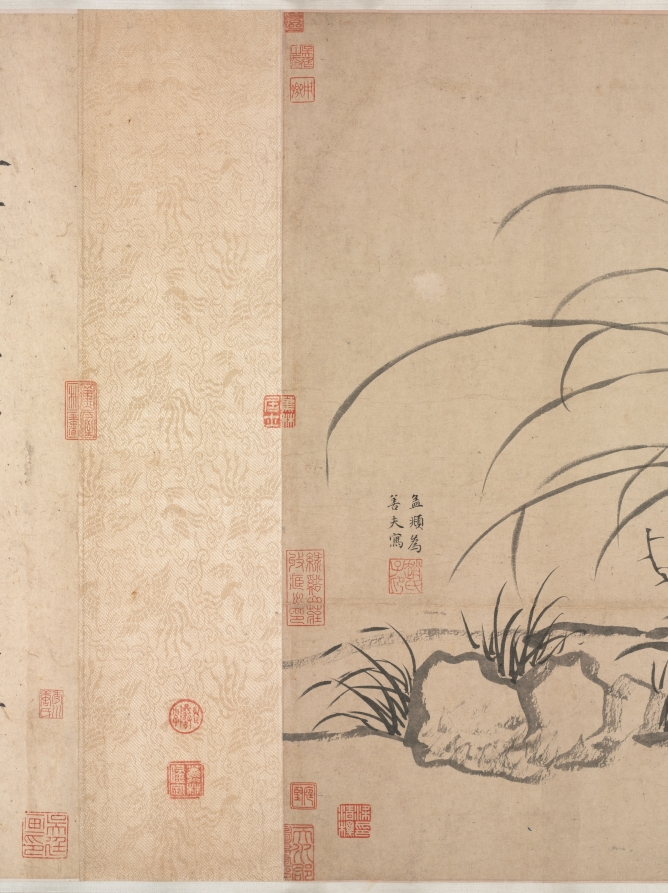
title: Bamboo, Rocks and Lonely Orchids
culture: China, Yuan dynasty (1271-1368)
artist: Zhao Mengfu (Chinese, 1254–1322)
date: 1271–1368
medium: Handscroll; ink on paper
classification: Painting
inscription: 竹石幽蘭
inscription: 孟頫為善夫寫. [印] 趙氏子昂; [印] 松雪齋; [印] 天水郡圖書印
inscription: 古人善書者必能畫點墨作蠅，便自有生意。松雪翁蘭石草聖飛帛筆法皆具，可寶也。安陽韓性 [印]明善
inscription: Colophon 2. Qiu Yuan 仇遠 (1247-after 1328), a respected poet during the Song and Yuan periods. He was linked to, among others, Zhao Mengfu and Gao Kegong. Zhao Mengfu painted a version of Nine Songs 九歌圖 for him, and Gao Kegong dedicated to him a painting titled Mountain Village 山村圖 (current whereabouts unknown). His poem here is also preserved in his collected works.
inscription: Colophon 3. Zheng Yuanyou 鄭元祐 (1292-1364), an erudite scholar and teacher of renown, active in Hangzhou and Suzhou. In the 1350s, when Gu Ying’s literary gatherings were at their peak, he was already elderly and participated in a limited way.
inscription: Colophon 4. Wu Kegong 吳克恭 (active mid-1300s), a friend of Gu Ying and Ni Zan 倪瓚 (1301–1374), a major Yuan painter.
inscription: Colophon 5. Angji 昻吉 (jinshi of 1348), of Western Xia 西夏 origin and a poet of distinction. He wrote an introduction to the painting Literary Gathering at Yushan 玉山雅集圖, of which Zhang Wo was the painter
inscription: Sheet 2. Yuan: friends of Gu Ying Colophon 6. Wang Zifang 王孜方 (active mid-1300s), an official who, at the time of his visits to Gu Ying’s estate, had reached the rank of Minister. He is better known under the name Wang Keju 王可矩.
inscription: Colophon 7. Ke Jiusi 柯九思 (1290–1343), a major official who served in the Kuizhang Pavilion 奎章閣 and as an advisor to Emperor Wenzong in matters of calligraphy and painting.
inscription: Colophon 8. Yu Li 于立 (active mid-1300s), a Daoist recluse, poet, and close friend of Gu Ying, so much so that during his visit to Gu Ying’s estate he was given accommodation in a special pavilion. His poem here is also preserved in Gu Ying’s Cao tang ya ji.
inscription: 至正十一年十月廿八日男奕百拜堇觀 [印] 趙奕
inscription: Colophon 10. Yu Ji 虞集 (1272-1398), a major official and literary figure who also served in the Kuizhang Ge. His poem is recorded in his collected works. The poem is one of a set of four inscribed at the request of Wang Huayu 汪華玉 on Orchids and Rock 蘭石圖 by Zhao Mengfu, obviously a different, long lost, painting. Wang Huayu was an official and a collector (jinshi of 1327). Yu Ji’s colophon here was written before 1348 and during his retirement in Linchuan 臨川, Jiangxi, possibly sent from there. It is possible he had not seen the painting, and his calligraphy here appears to be rather casual and detached, jotting down an old poem without much care, contrary to his earlier practice.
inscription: Colophon 11. Sun Shi 孫時 (mid-1300s–early 1400s), a native of Yuncheng 鄆城, Shandong, and a jinshi of 1390. He may have been quite young when paying a visit to the Yushan gatherings in the late 1340s and early 1350s.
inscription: Colophon 12. Zhang Zhu 張翥 (1287–1368), Qiu Yuan’s disciple and a poet of renown, who enjoyed a belated career in officialdom and was known for his integrity.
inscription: Sheet 4. Yuan and Ming: further friends of Gu Ying; colophon 17 begins the early Ming sequence. Colophon 13. Zhang Wo 張渥 (active c. 1336-after 1364), a frustrated scholar, a poet, and a painter of landscape and figures. An active participant in Gu Ying’s literary circle, he painted the Literary Gathering at Yushan, a pictorial document of the individuals and activities on Gu Ying’s estate. His rendering of Nine Songs is well known, and one version is in the collection of the Cleveland Museum of Art (see 1959.138). His poem here is also found in Gu Ying’s Cao tang ya ji, under the entry “ti Zhao Hanlin mo lan 題趙翰林墨蘭” (inscribed on the Ink Orchid by Zhao the Hanlin academician). This is a rare instance of calligraphy as well as signature by the artist.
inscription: 觀吳興公竹石幽蘭圖使人鄙吝頓消。其筆勢從橫天真爛澷，一出於二王書法。冝仲瑛寳而玩之異於常品也。至正八年十月天台陳基書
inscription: Colophon 15. Zhang Shen 張紳 (active about 1340–after 1385), a respected calligrapher and participant in Gu Ying’s literary gathering. He resided in Kunshan, the same city where Gu Ying’s estate lies. In the third line of the poem, he mentioned Gu Ying’s hao, “Jinsu 金粟.” This was a name he assumed later in life, after the death of his mother in the year 1356. Thus this inscription must have been written after that date.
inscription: Colophon 16. Wang Sun 汪遜 (active mid-14th century), a little-known native of Kuaiji 會稽, who may have been one of the infrequent visitors to Gu Ying’s estate.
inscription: Colophon 17. Hu Guang 胡廣 (1370-1418) is the first Ming colophon writer on this scroll. He was an official of great power in the court and a trusted advisor of Emperor Chengzu; he served as the Grand Academician of the Hall of Literary Profundity 文淵閣大學士 and Grand Academician of the Left Secretariat of the Heir-Apparent 左春坊大學士.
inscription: Sheet 5. Early Ming Colophon 18. Wang Yinshi 王尹實 (active about 1403–about 1424), a native of Siming 四明, Zhejiang, and a minor official and calligrapher.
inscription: Colophon 19. Zhang Yuchu (signed here as “Wuwei 無 為”), the forty-third Heavenly Master of the Zhengyi sect of Daoism. A man of erudition, he was also a poet, painter, and calligrapher. A modified version of the poem here was published in his collected works titled Xian quan ji 峴泉集. A slight modification in the first line is the only change: “Wu xing miao yao nian bing xue zi 吳興玅年氷雪姿.”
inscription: Colophon 20. Yao Guangxiao 姚廣孝 (1335-1418), a Buddhist monk, scholar, and counselor to Chengzu in his successful attempt at usurpation of the throne. Yao Guangxiao was a controversial figure but wielded enormous power.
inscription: Sheet 6. Wang Ning alone Colophon 21. Wang Ning 王寧 (d. 1411) signed as “Qingzhen 清真” in this colophon. One of the three seals reveals his identity as the Yongchun Hou 永春侯 [Marquis of Lasting Spring] (appointed 1402), and the husband of Princess Huaiqing 懷慶公主 (1328-1398), the sixth daughter of the founder of the Ming dynasty, Zhu Yuanzhang. This colophon postdates 1402.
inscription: Sheet 7. Mid-Ming Colophon 22. Ou Yi’an 區易安 (active first half of 15th century), unknown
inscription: Colophon 23. Chen Lian 陳璉 (1370-1454), a native of Dongguan 東莞, Guangdong 廣東, and an official admired for his erudition and perspicacity. In view to the known calligraphic style of Chen Lian, this colophon appears to be a transcription and not written by him.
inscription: Colophon 24. Wei Ji 魏驥 (1374-1471) enjoyed longevity (he lived to the age of ninety-eight) and an extended length of service as an official. A jinshi of 1406, he eventually became the Minister of Personnel in Nanjing 南京吏部尚書. The colophon here is dated 1434, when he was invited to view the painting by the Court Musician Mo Zhizhong 莫至翀, its owner. Again, in view of its calligraphic style, this was not written by him, but is a transcription from the original.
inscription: Colophon 25: Zhang Yi 章鎰 (active 1462-1473), a Ningbo native and an official with a reputation for courage and integrity.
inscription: Sheet 8. Further mid-Ming Colophon 26. Yin Zhi 尹直 (1427-1511), a controversial figure in Ming politics in spite of his erudition and high position as the Minister of War 兵部尚書.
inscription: Colophon 27. Zou Yu 鄒虞 (active 1460-1520; jinshi of 1490), a native of Hangzhou. In 1510, he was appointed Administrative Vice Commissioner in Guangdong.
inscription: Sheet 9. Xu Shouhe 徐守和 alone Colophon 28. Xu Shouhe 徐守和 dated his entry in 1629. Since he wrote it in his own studio, The Lesser Qingbi Pavilion 小清閟, he was likely the owner of the scroll. Xu’s life is not well documented; he was a connoisseur of note during the last years of the Ming dynasty rule. He may have acquired the Cleveland scroll from Wu Ting, whose seals appear here.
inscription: Sheet 10. The mounter’s note. Xu Shudong 徐曙東 of Jiaxing 嘉興 made the remounting on the first day of sixth month, 1802.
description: Bamboo and orchids are motifs associated with the virtues of the scholar-official. Bamboo that bends but does not break stands for moral integrity, endurance, and loyalty. Wild, fragrant orchids that bloom in the shadow symbolize modesty and the aura of learnedness. Rocks are often considered to be miniature versions of mountains that form the universe. This monochrome ink painting is brushed on paper in a masterfully calligraphic manner. While the rocks are delineated in chalky, dry strokes showing the effect of flying white (feibai), the bamboo and orchids are drawn with a swift brush demonstrating the virtuosity of the artist.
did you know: One of the many inscriptions records that the handscroll was last remounted by Xu Shudong 徐曙東 of Jiaxing 嘉興 in 1802.